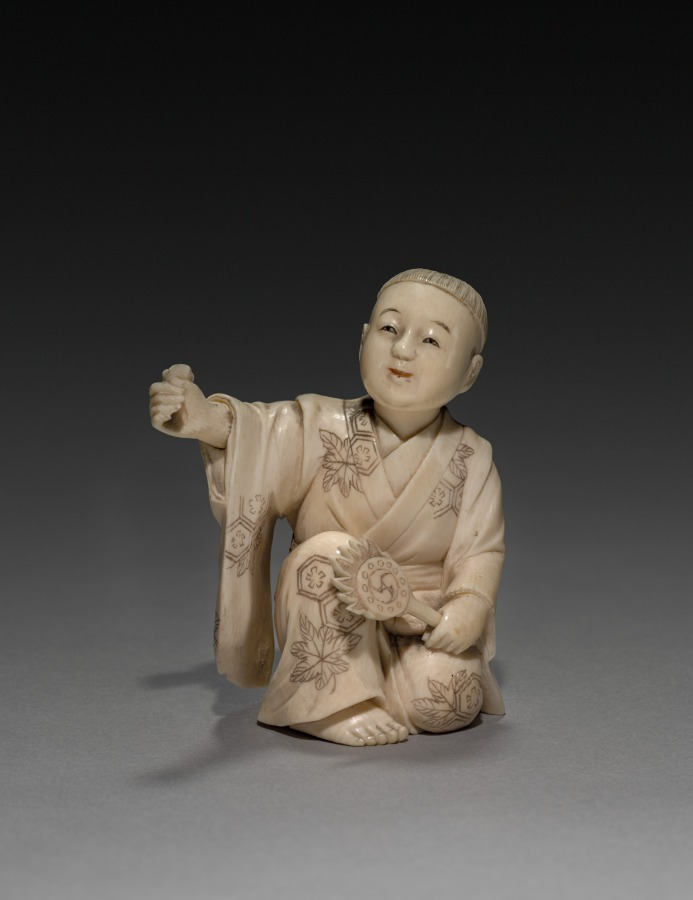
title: Kneeling Boy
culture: Japan, Meiji period (1868–1912)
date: early 1900s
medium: ivory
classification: Ivory